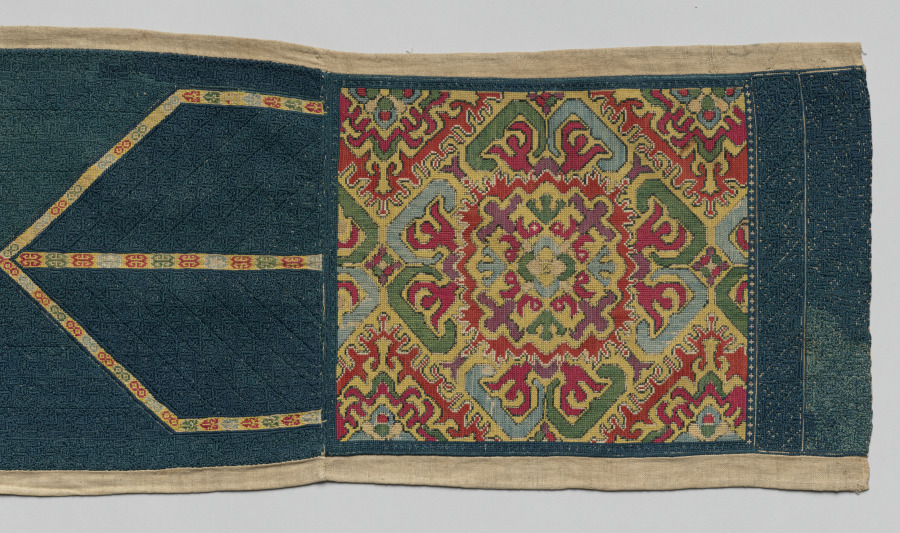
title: Furnishing textile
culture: Africa, North Africa, Morocco, Chefchaouen, Moroccan embroiderer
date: 1600s–1700s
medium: silk on linen tabby ground, embroidery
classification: Embroidery